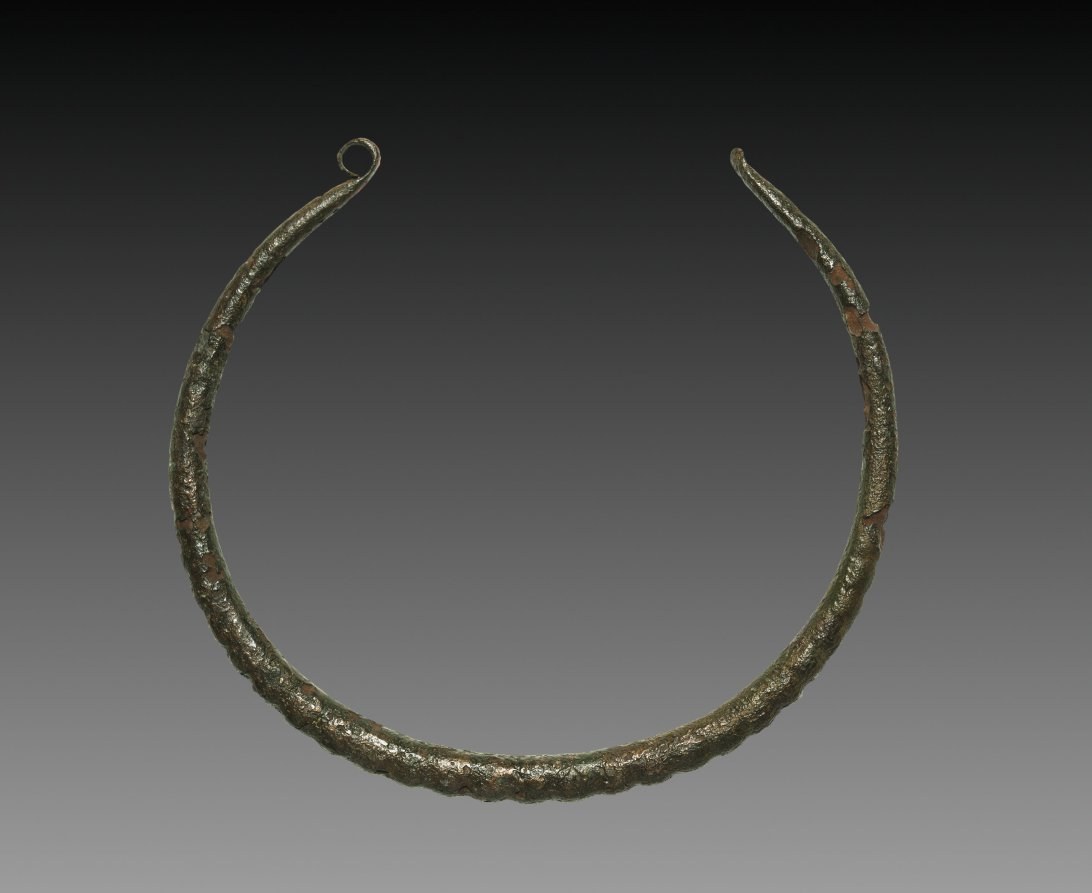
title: Necklace or Torque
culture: Iran, Luristan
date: 2000–1000 BCE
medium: bronze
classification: Jewelry